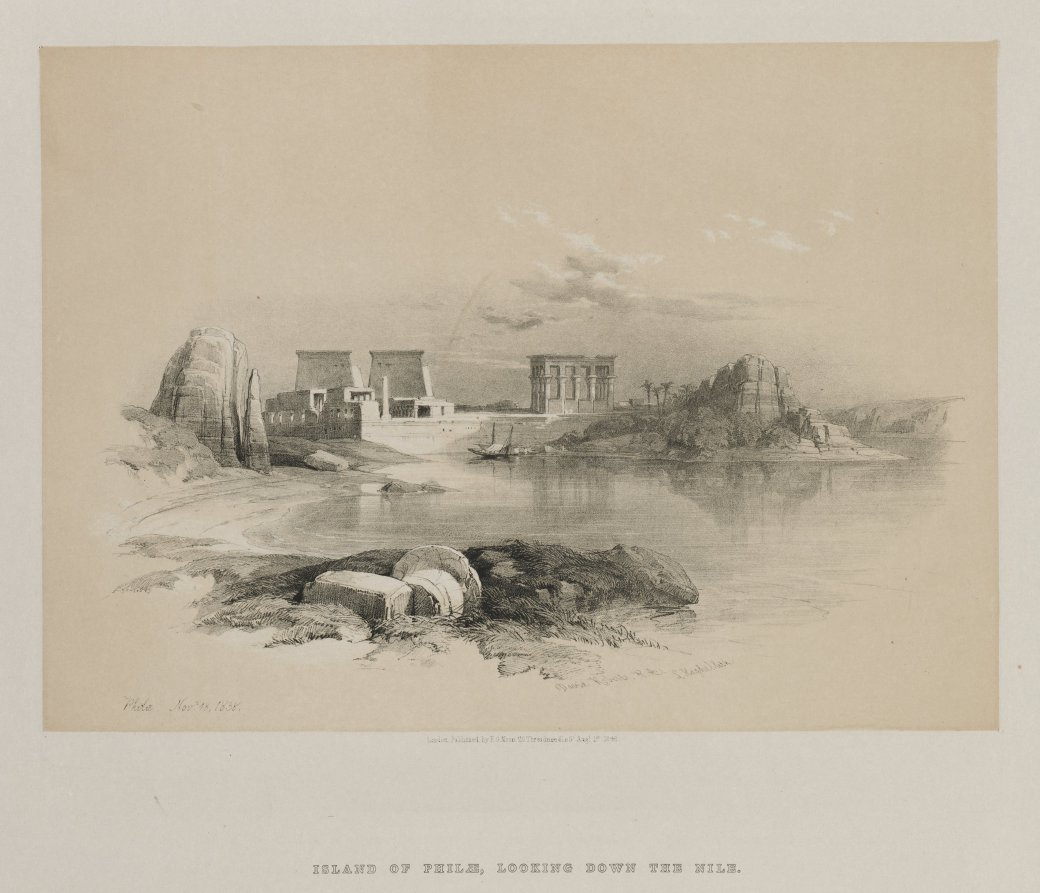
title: Egypt and Nubia, Volume II: Philae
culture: England, 19th century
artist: Louis Haghe (British, 1806–1885)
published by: F. G. Moon, 20 Threadneedle Street, London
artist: after David Roberts (Scottish, 1796–1864)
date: 1848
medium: color lithograph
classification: Print